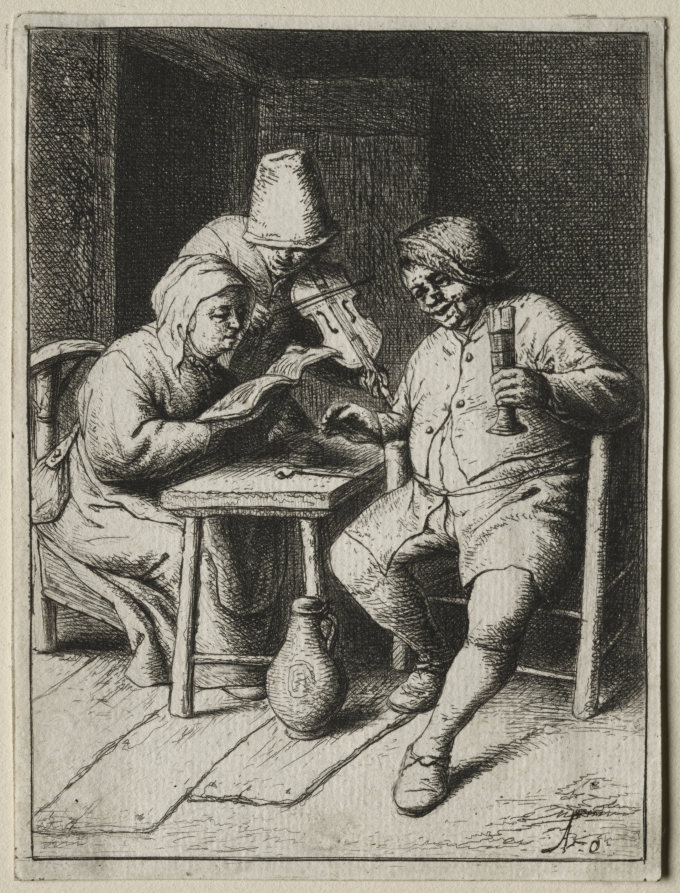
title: The Singer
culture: Netherlands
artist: Adriaen van Ostade (Dutch, 1610–1684)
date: c. 1653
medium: etching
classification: Print